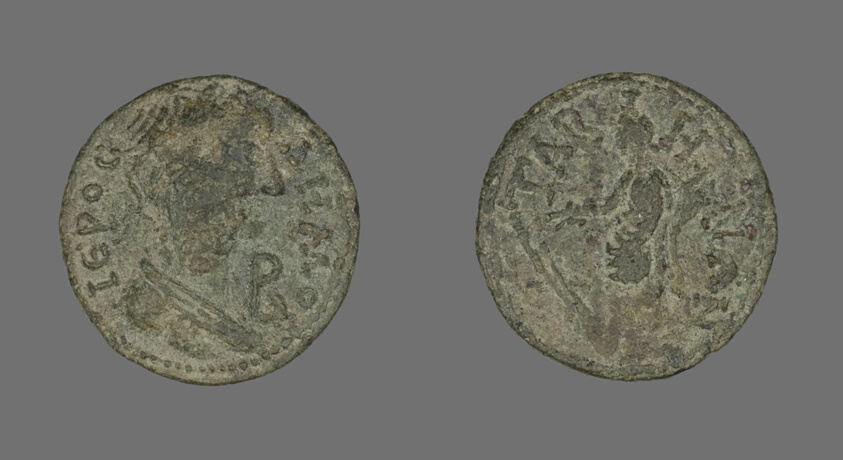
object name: Coin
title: Coin Depicting Populus Romanus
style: roman (ancient, style or period)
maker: Roman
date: 79-81 or 211-217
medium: Bronze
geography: Roman Empire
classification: coin; ancient art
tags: head